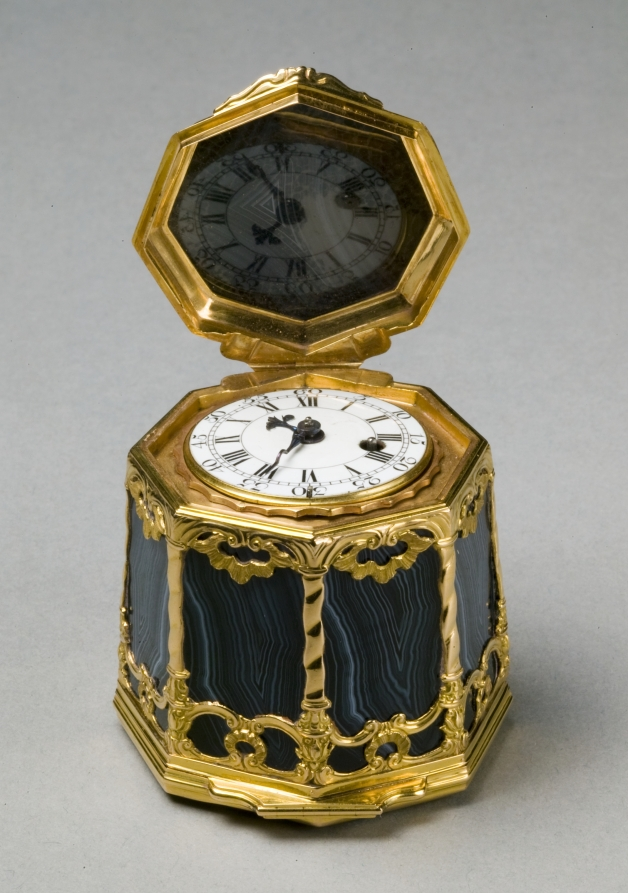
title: Snuff Box with Clock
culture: England, London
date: c. 1750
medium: gold-mounted agate, enamel dial, glass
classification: Miscellaneous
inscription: Dial signed frs: "de-la Balle"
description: Luxurious personal objects, like this snuff box, were an essential part of a privileged wardrobe during the 1700s and early 1800s, emphasizing their owner’s refinement and wealth. Their glittering surfaces, however, disguised a system based on the labor and suffering of enslaved or indentured people, whether in gold or stone mines, tobacco farms, or shops where these goods were made. This small, elaborate box held snuff, a form of powdered tobacco that was inhaled in tiny amounts. Like cotton, sugar, and tea, snuff came from British colonies in America, India, and the Caribbean, where enslaved people were exploited to grow these crops under extremely harsh conditions. Slavery was not abolished in much of the British Empire until 1833. Britain and other European nations continued to pursue colonialism with a sense of superiority that found its way into all aspects of life, including decorative objects glorifying their conquests.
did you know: During the 1700s, snuff boxes, jewelry, and watch cases were often made in the same workshops, creating multifunctional items such as this time-keeping snuff box.